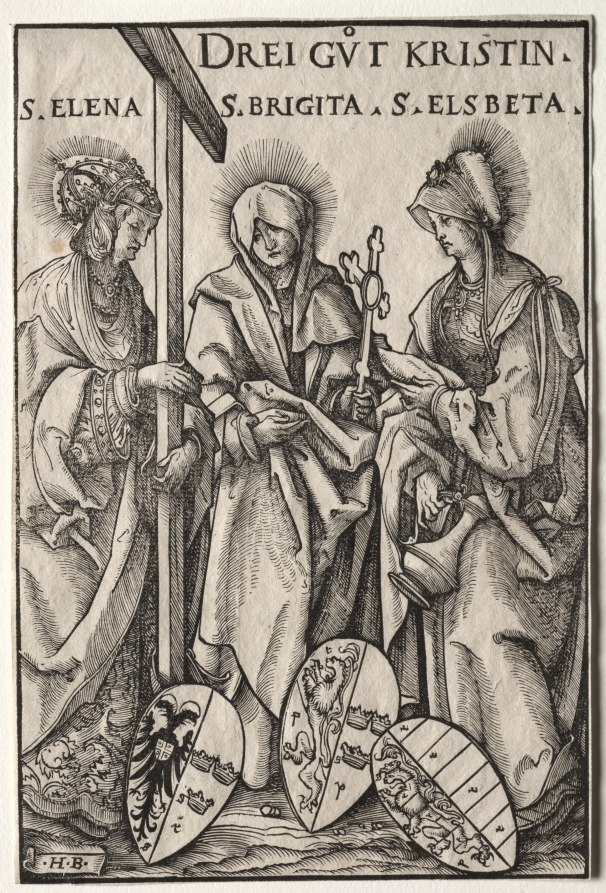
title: The Three Christian Heroines: Saints Helen, Bridget and Elizabeth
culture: Germany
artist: Hans Burgkmair (German, 1473–1531)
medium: woodcut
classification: Print